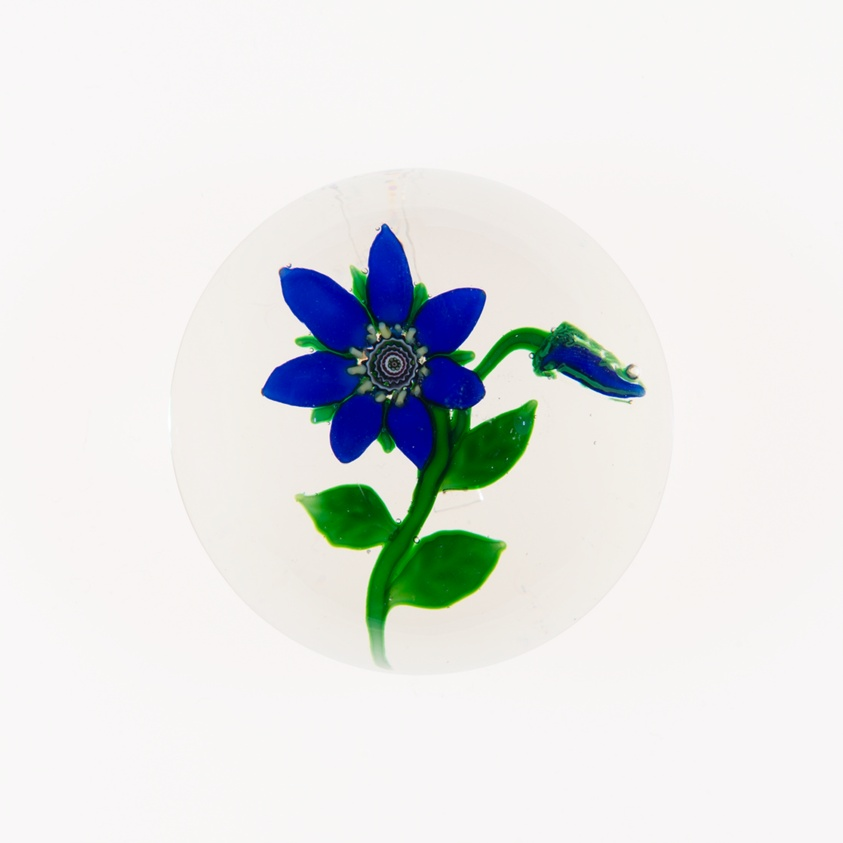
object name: Glass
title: Paperweight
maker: Clichy Glassworks (Cristalleries de Clichy); Clichy, France, 1837-1885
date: c. 1845/60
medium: Glass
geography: France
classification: paperweight; glass